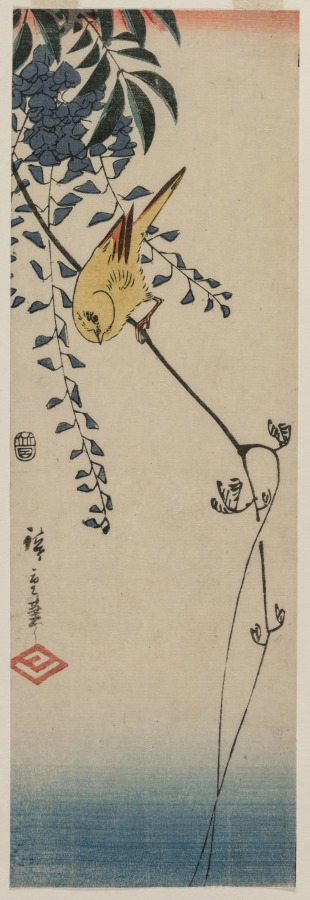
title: Canary and Wisteria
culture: Japan, Edo period (1615–1868)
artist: Utagawa Hiroshige (Japanese, 1797–1858)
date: mid-1840s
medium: color woodblock print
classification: Print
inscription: Signature: Hiroshige hitsu Artist Seal: Hiro Censorship Seal: Fukatsuya Ihei (Fu)